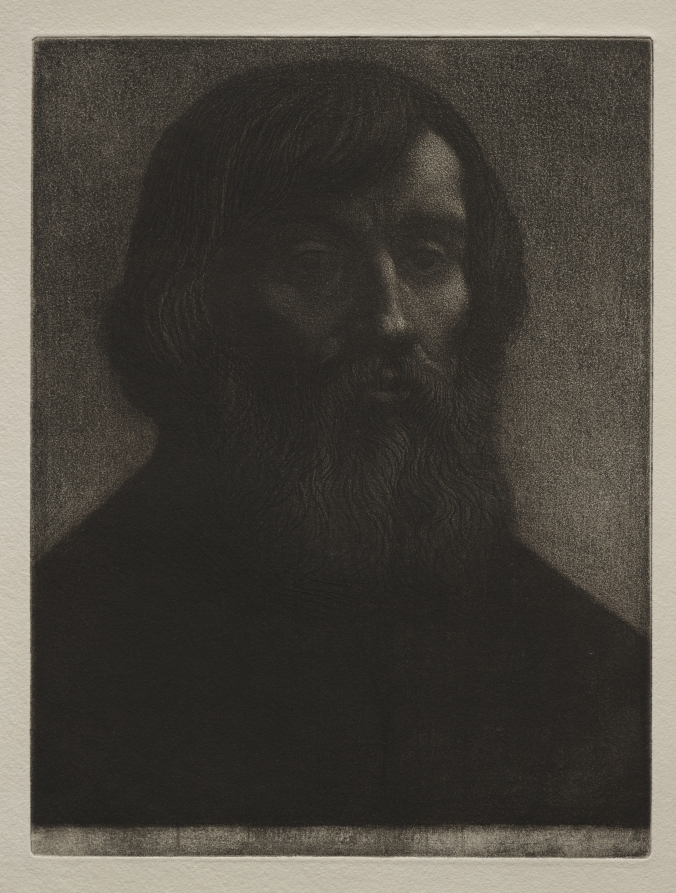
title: The Poet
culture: France, 19th century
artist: Alphonse Legros (French, 1837–1911)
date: c. 1857–1911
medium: etching and aquatint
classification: Print